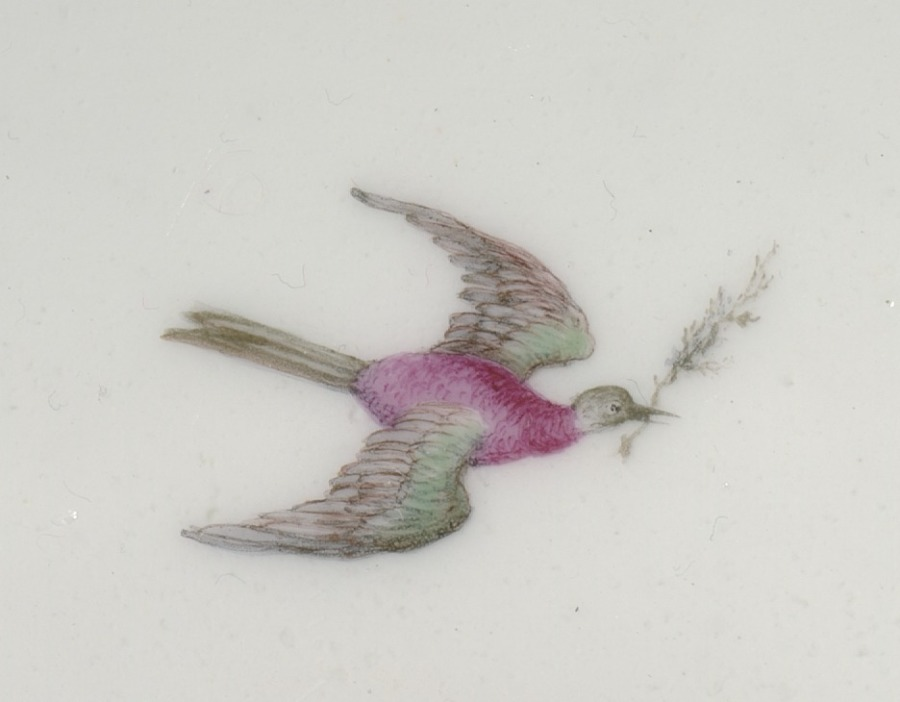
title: Covered Tureen (Terrine ancienne or Terrine ordinaire)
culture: France, Vincennes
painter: attributed to Louis-Denis Armand (French, active c. 1745–1783)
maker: Vincennes Porcelain Factory (France, 1740–56)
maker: probably by Jean-Claude Duplessis le Père (French, 1690–1774)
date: c. 1752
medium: soft-paste porcelain with enamel and gilt decoration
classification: Ceramic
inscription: [Interlaced foliate 'L's surmounted by a fleur-de-lys (indicating royal commision), in blue]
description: The intricately painted birds that decorate this tureen are the work of Louis-Denis Armand. Armand was known for his depictions of birds and landscapes, a specialty that may have come from his work as a painter of lacquered furniture with similar compositions. This tureen was likely designed by master goldsmith Jean-Claude Duplessis who began working as an artistic director at the Vincennes Porcelain Factory in 1748.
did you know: This object was manufactured in soft-paste porcelain, a material used by many European porcelain factories before they were able to emulate the hard-paste porcelain of China and Japan.